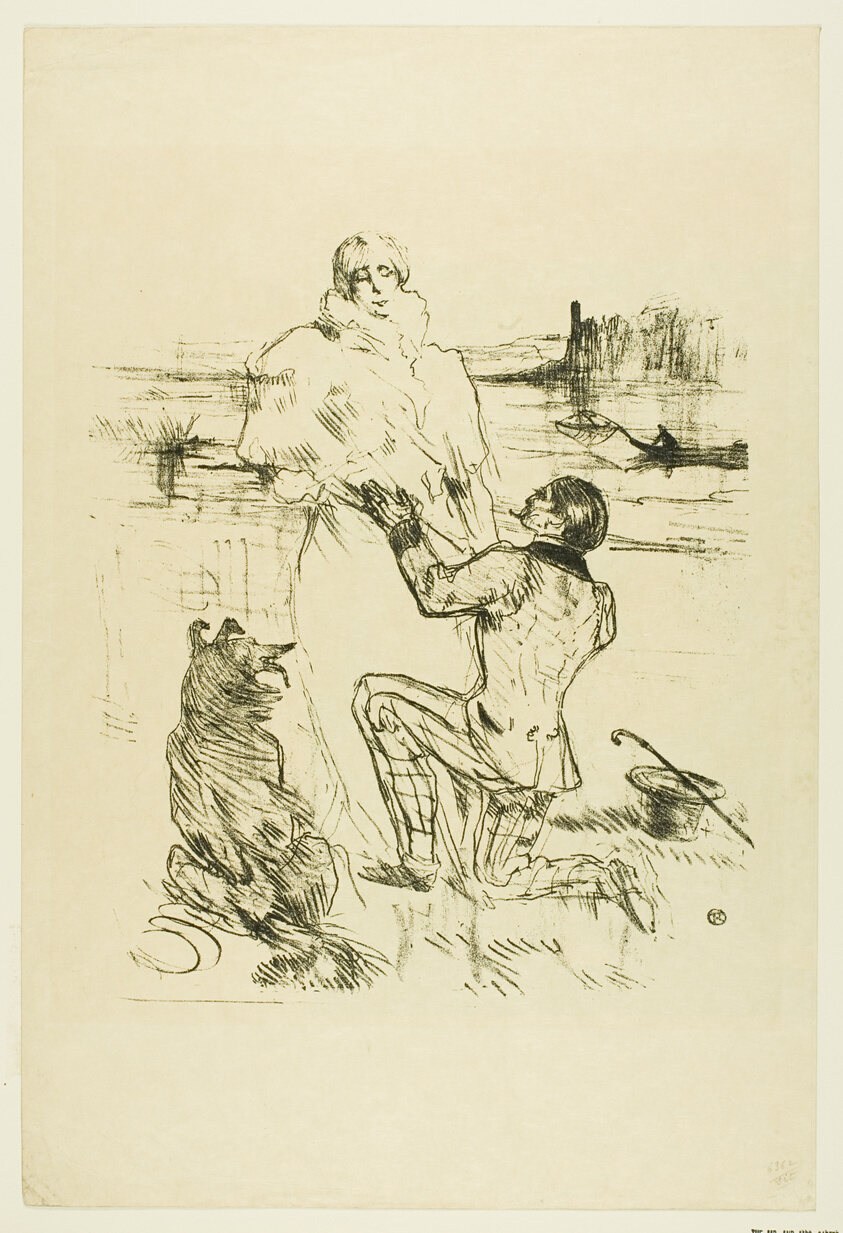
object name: Print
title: Proposal (first plate)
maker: Henri de Toulouse-Lautrec (French, 1864-1901)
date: 1898, printed before 1923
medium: Lithograph on cream wove paper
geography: France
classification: lithograph; print; prints and drawing